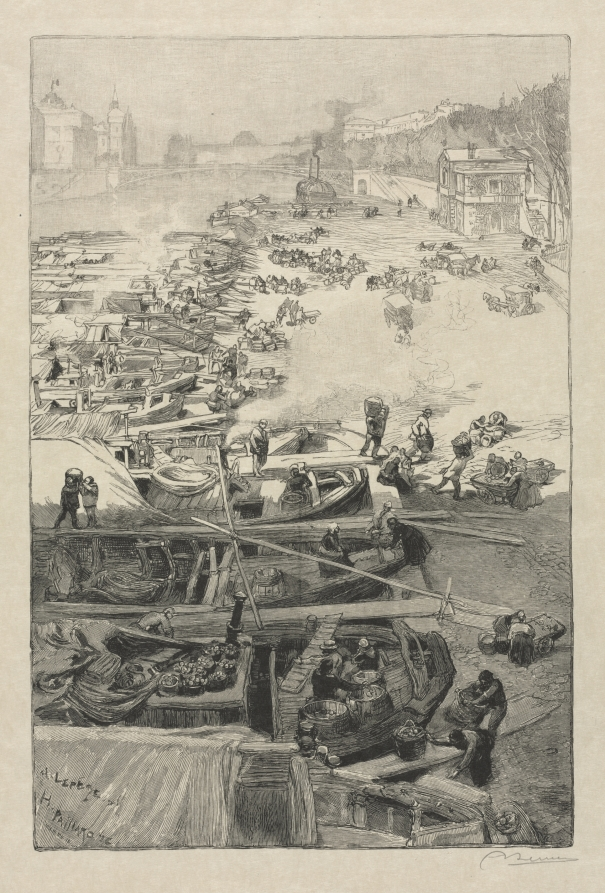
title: Potatoes Arriving at the Hôtel de Ville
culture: France, 19th century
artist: Auguste Louis Lepère (French, 1849–1918)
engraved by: and Henri Pierre Paillard (French, 1844–1912)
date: 1883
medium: wood engraving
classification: Print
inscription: in pencil, lower right margin: A Lepere